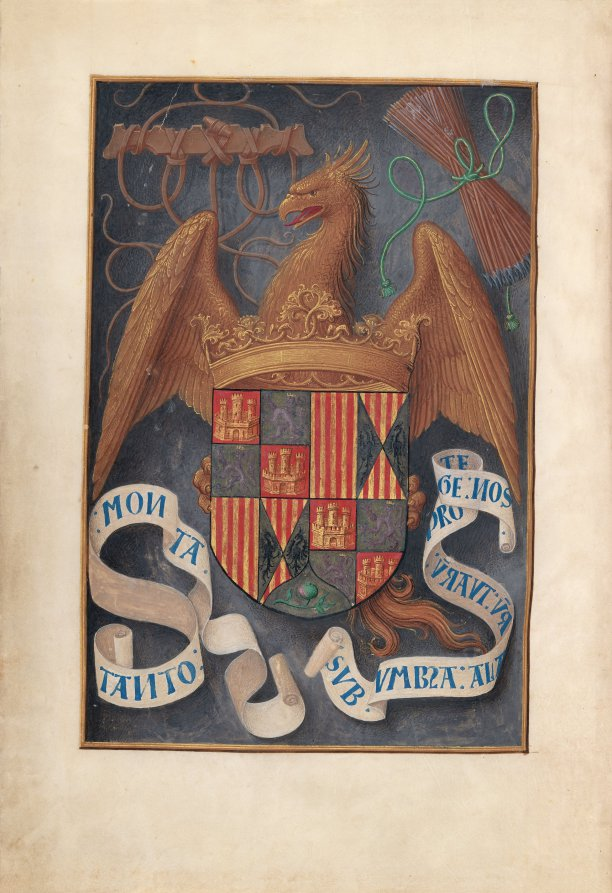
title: Hours of Queen Isabella the Catholic, Queen of Spain: Fol. 1v, Arms and Mottoes of Isabel la Católica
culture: Flanders, Ghent and Bruges, late 15th century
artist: Master of the First Prayerbook of Maximillian (Flemish, c. 1444–1519)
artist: and Associates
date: c. 1500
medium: ink, tempera, and gold on vellum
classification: Bound Volume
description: This manuscript was illuminated by a circle of at least five highly organized manuscript painters active in the Flemish cities of Ghent and Bruges. The principal illuminator was Alexander Bening, who painted the majority of the book's miniatures. Manuscripts produced by this circle of artists are renowned for the decoration of their borders, which typically feature a rich variety of realistically painted flowers, birds, and butterflies. This prayer book, called a book of hours, was intended not for a cleric but for the private devotions of a lay person—in this case, Isabella the Catholic, Queen of Spain (1451–1504); her coat of arms embellishes the book's frontispiece. It is unlikely that the book was commissioned by the Queen herself; rather, she probably received it as a diplomatic gift from someone courting her patronage, perhaps Cardinal Francisco Jimenez de Cisneros. A Franciscan friar, Jimenez was dependent upon Isabella for his advancement, first to the post of Queen's confessor in 1492, and then to Archbishop of Toledo in 1495.